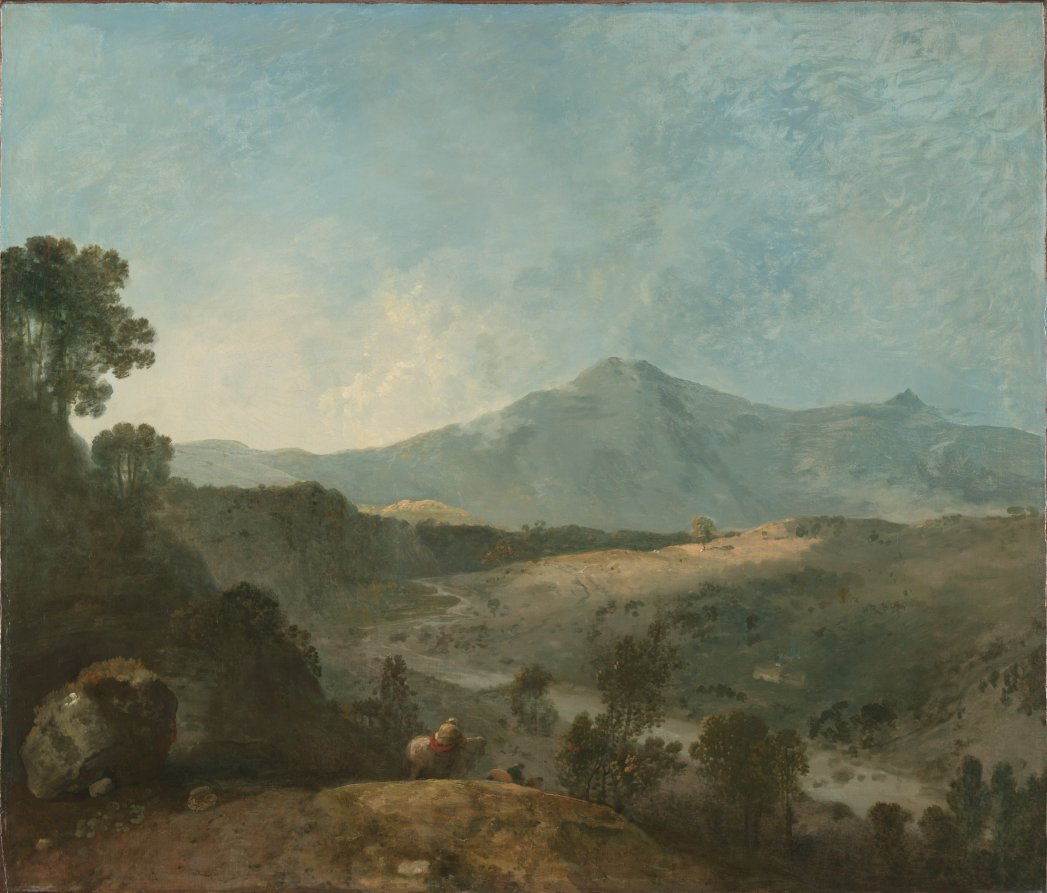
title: Cader Idris, with the Mawddach River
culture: England, 18th century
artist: Richard Wilson (British, 1714–1782)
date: c. 1774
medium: oil on canvas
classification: Painting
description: In the distance the peak of Cader Idris is shown, while riders in the foreground descend toward the river Mawddach. Although almost all of Wilson's earlier pictures of Wales suggest some association with that country's heroic past, here the emphasis is on the pleasing beauty of the land. Another version of this picture is in the Walker Art Gallery in Liverpool. Richard Wilson was the first major British artist to specialize in landscape, a focus he pursued intently after a visit to Italy in 1750-6. The countryside around Rome, with its rich associations of ancient grandeur, inspired him to look at landscape as a source of poetry. Back in England his Italian landscapes, which appealed to his patrons (mostly English noblemen) were a great success. He then applied a similar approach to his English and Welsh scenes, treating them as vehicles for ideas and emotions.